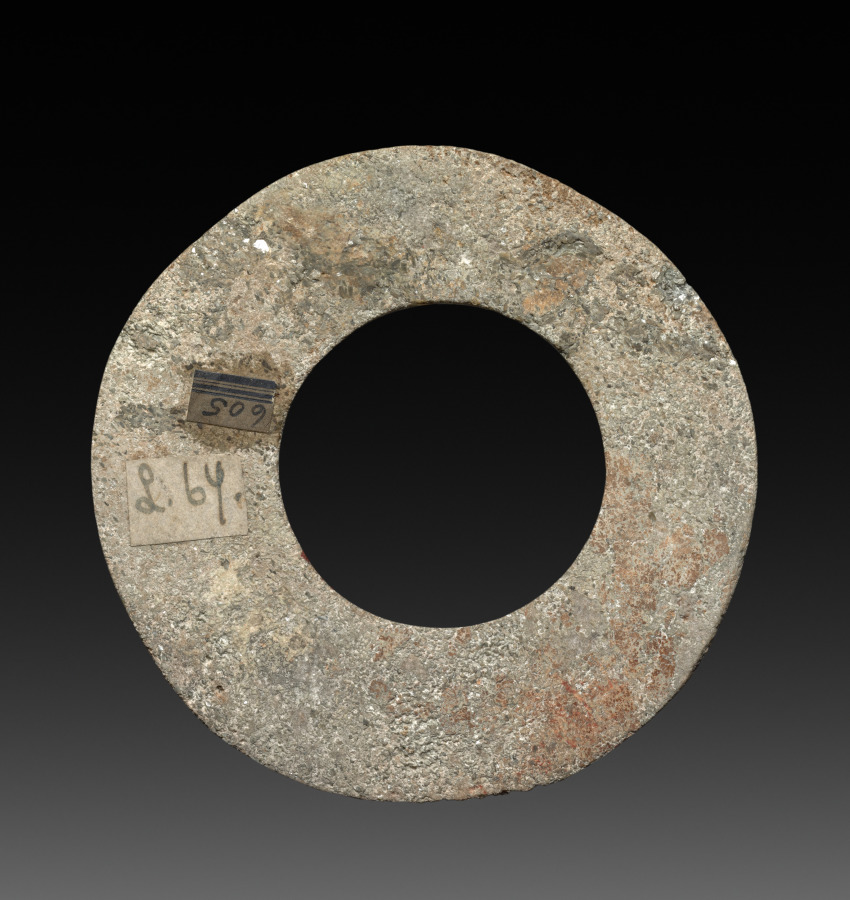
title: Ring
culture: China, Han dynasty (202 BCE–220 CE) or later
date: 200 CE or later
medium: stone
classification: Jade